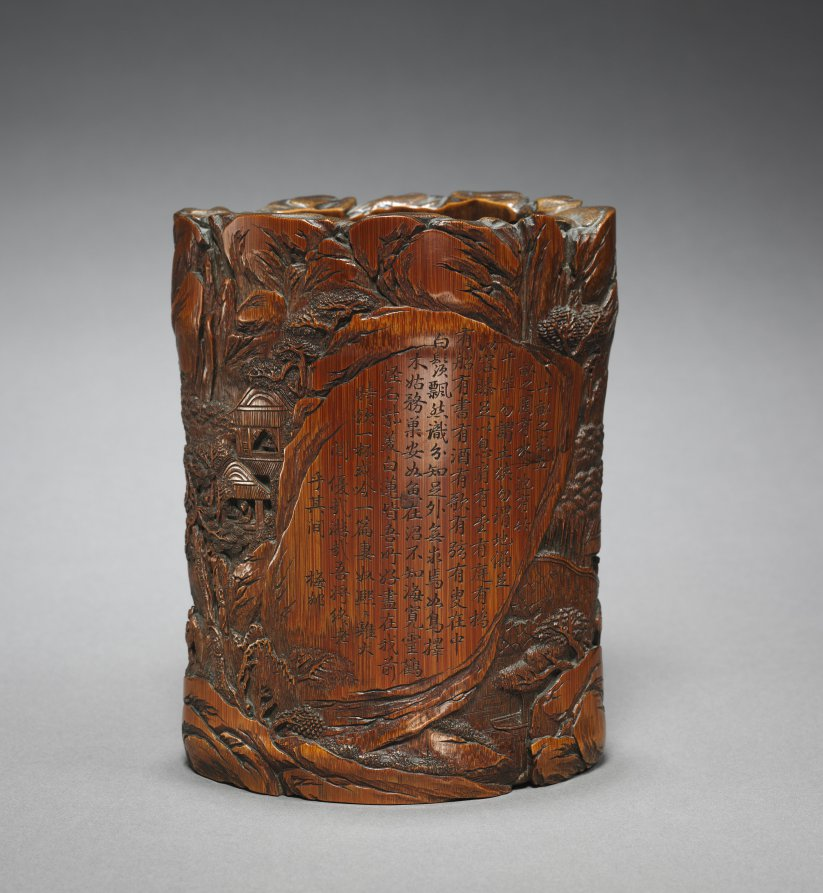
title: Brush Holder with Figures in Landscape and Poetic Inscription by Wang Meilin from Jiading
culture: China, Qing dynasty (1644-1911), Daoguang reign (1821-50)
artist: Wang Meilin (Chinese, active c. 1825)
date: 1800s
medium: carved bamboo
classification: Wood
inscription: A ten-acre [home], a five-acre yard with a water pool, and a thousand bamboos. Don’t say the field is narrow, or the location remote. It is enough to accommodate the knee and rest the shoulder. It has a hall and a yard, a bridge and a boat. It has books and wine, songs and string [instruments]. An old man in the midst of it, his white beard flowing. [He] is moderate and satisfied, has no demands and needs. Like a bird he chooses a branch, builds a nest, and rests at ease. Like a fish in a swamp, that does not know how wide the ocean is. . . . All I like, lies before me. I drink a cup of wine from time to time, recite a [poem], wife and children play, chicken and dogs are at leisure, and I will grow old here.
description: This bamboo brush holder shows a scholar inside a mountain retreat under trees. On its back side, a cliff inscribed with a text by the Tang poet Bai Juyi (772–846) describes the carefree life of a scholar among family and servants in the countryside. The text in cursive script style calligraphy (xingshu) says: A ten-acre [home], a five-acre yard with a water pool, and a thousand bamboos. Don’t say the field is narrow, or the location remote. It is enough to accommodate the knee and rest the shoulder. It has a hall and a yard, a bridge and a boat. It has books and wine, songs and string [instruments]. An old man in the midst of it, his white beard flowing. [He] is moderate and satisfied, has no demands and needs. Like a bird he chooses a branch, builds a nest, and rests at ease. Like a fish in a swamp, that does not know how wide the ocean is. . . . All I like, lies before me. I drink a cup of wine from time to time, recite a [poem], wife and children play, chicken and dogs are at leisure, and I will grow old here.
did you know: Bamboo was considered a humble material that suited the Confucian ideals of frugality and modesty.